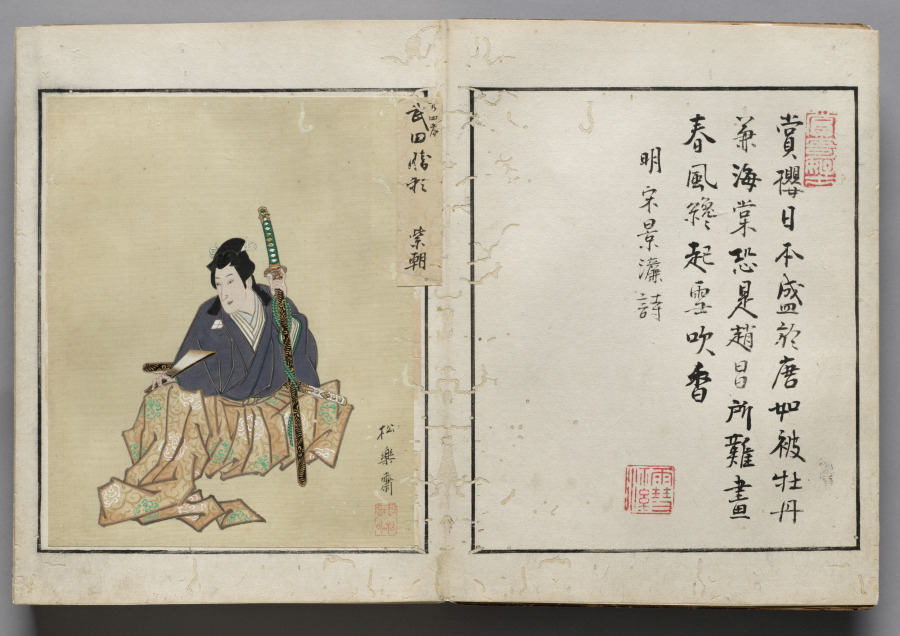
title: Double-Leaf from Album of Actor Portraits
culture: Japan, Edo period (1615–1868)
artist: Shōrakusai (Japanese)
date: c. 1790–1810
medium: double-leaf from accordion-style album; ink on paper (right) and and ink and color on silk (left)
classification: Bound Volume